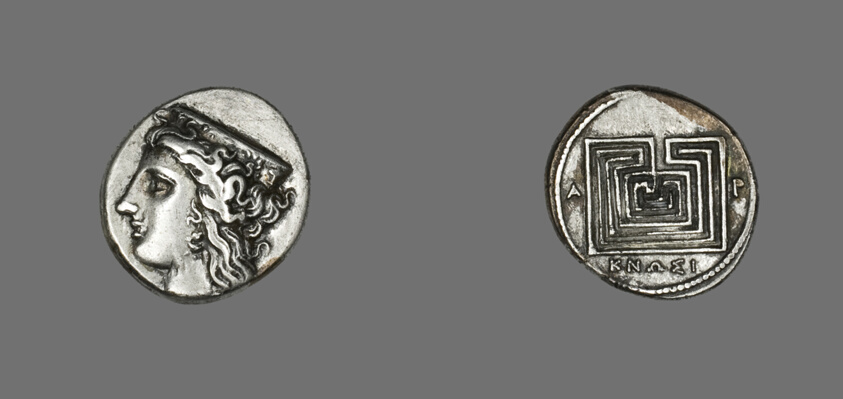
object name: Coin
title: Drachm (Coin) Depicting the Goddess Hera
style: cretan, ancient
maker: Greek; minted in Knossos, Crete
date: 350-220 BCE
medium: Silver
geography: Knossos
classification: coin; ancient art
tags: mythology, goddesses, gods (deities)